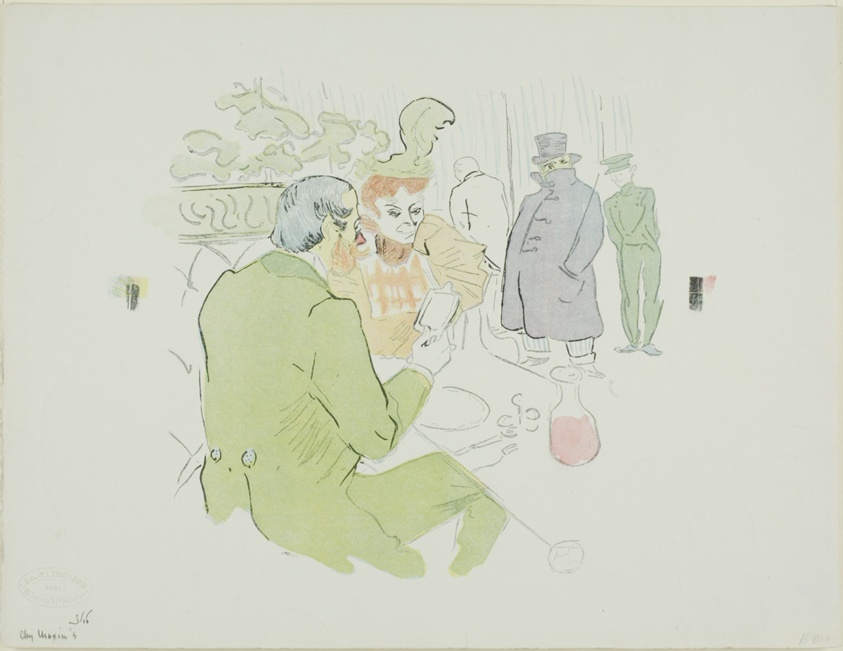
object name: Print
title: Snobbery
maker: Henri de Toulouse-Lautrec, after; French, 1864-1901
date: published April 24, 1897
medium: Color photorelief on coated ivory wove chine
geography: France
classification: photorelief; print; prints and drawing